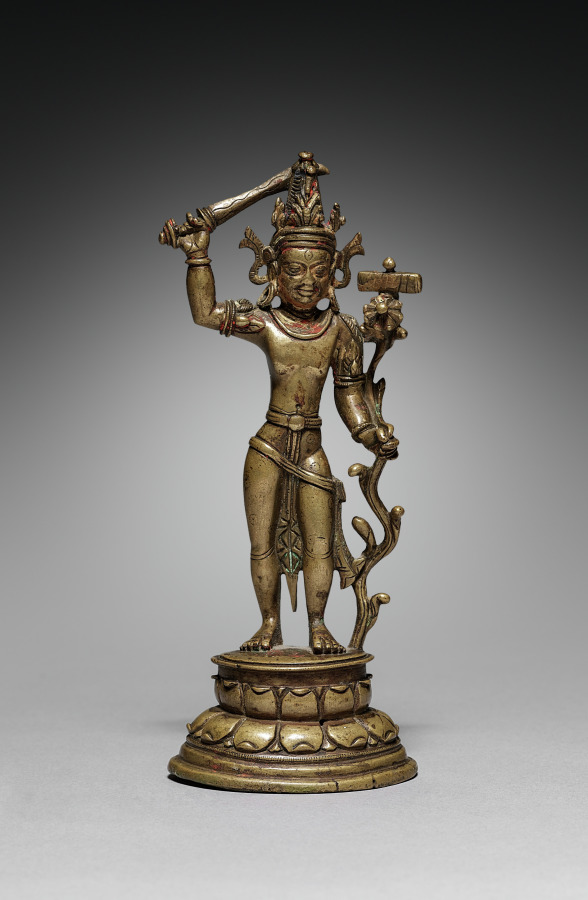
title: Standing Manjusri (Arapacana Form)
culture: India, Pala, 12th-13th century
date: 1100s-1200s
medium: bronze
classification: Sculpture